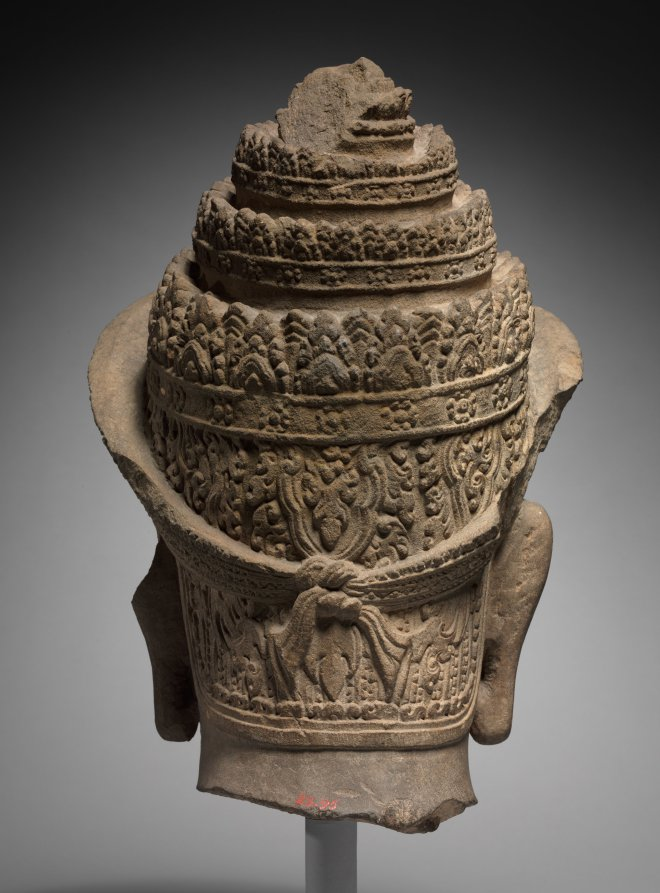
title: Head of a Deity or a Deified King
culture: Cambodia, Koh Ker, Reign of Jayavarman IV, 928-941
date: mid-900s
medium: sandstone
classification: Sculpture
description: The diadem is depicted tied to the intricate tiered headdress worn only by a god or king. Without further attributes, the identity cannot be known. Khmer sculptors of the 10th century emphasized powerful forms and extroverted expressions. The incised pupils suggest that this sculpture underwent the ritual of awakening, in which the eyes were added last. The royal head on the left is from a temple dedicated to Shiva, which was established by the Khmer king Jayavarman IV (928–942) in his remote capital of Koh Ker, 100 miles north of Angkor.